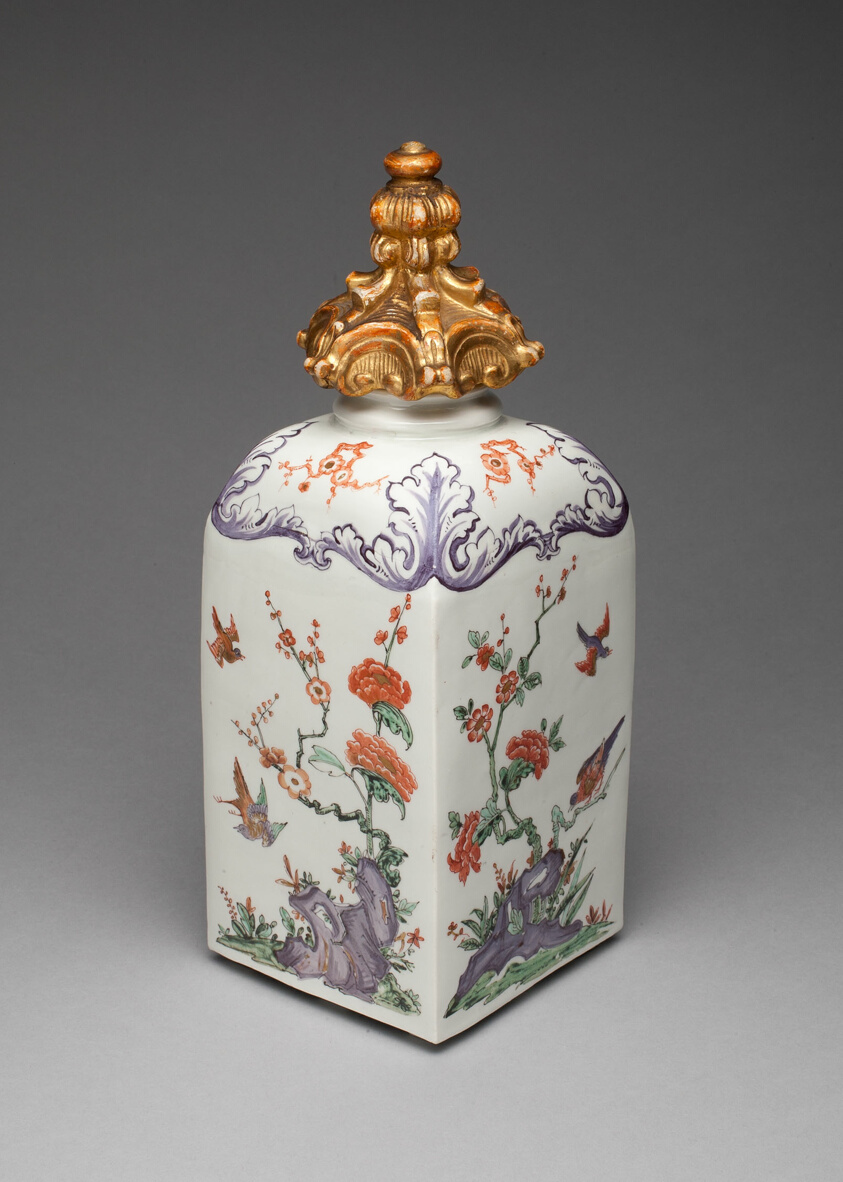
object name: Ceramics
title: Square-Sectioned Bottle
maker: Du Paquier Porcelain Manufactory (Austrian, 1718-1744)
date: c. 1725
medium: Hard-paste porcelain, polychrome enamels, gilding, and gilt wood stopper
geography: Vienna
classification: porcelain; ceramics; european decorative arts